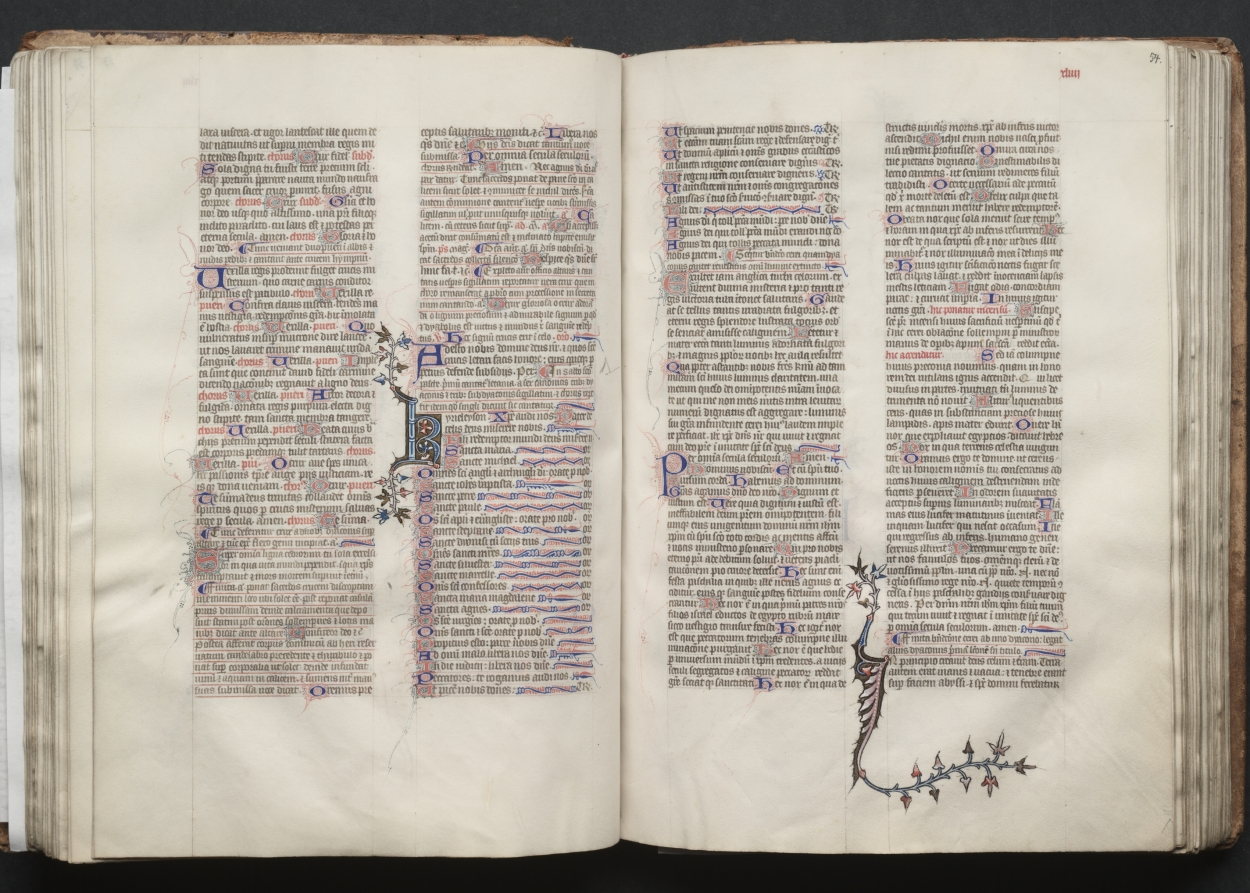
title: The Gotha Missal: Fol. 54r, Text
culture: France, Paris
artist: Master of the Boqueteaux (French)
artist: and Workshop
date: c. 1375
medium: ink, tempera, and gold on vellum; blind-tooled leather binding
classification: Bound Volume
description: The style and quality of this manuscript's decoration is typical of deluxe Parisian books made for aristocratic or royal patrons. Most of the book's decoration appears to be the work of the Master of the Boqueteaux, an artist active at the court of King Charles V (died 1380). His style was apparently shared by a number of book illuminators working in and around Paris. It is very possible that the Gotha Missal belonged to Charles V, but is not provable because the manuscript has no royal portraits and lacks a colophon. Given the book's magnificent decoration, however, it would seem that it was produced for a Valois prince, if not for the king himself. The manuscript receives its name from the German dukes of Gotha, its later owners.